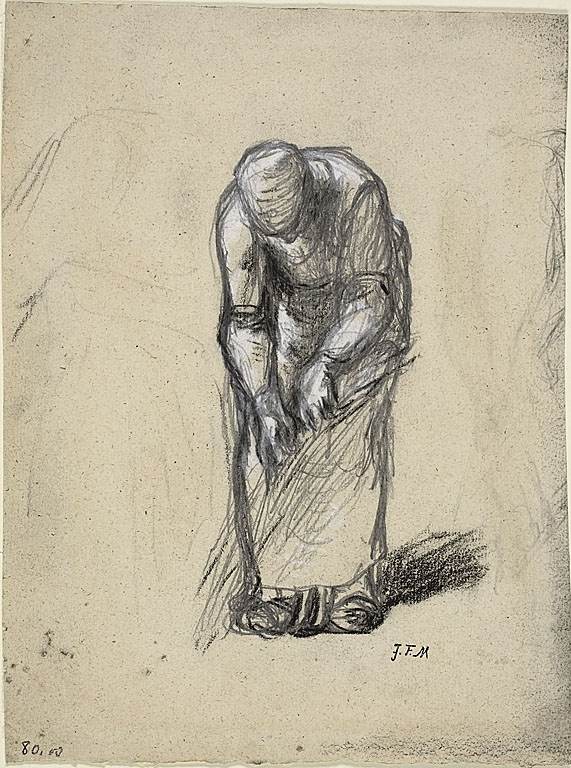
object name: Drawing and Watercolor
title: Study for Flax Pulling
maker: Jean François Millet (French, 1814-1875)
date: c. 1852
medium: Graphite, with black chalk, heightened with white gouache, on ivory laid paper, laid down on cream wove paper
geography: France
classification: graphite; drawings (visual works); prints and drawing